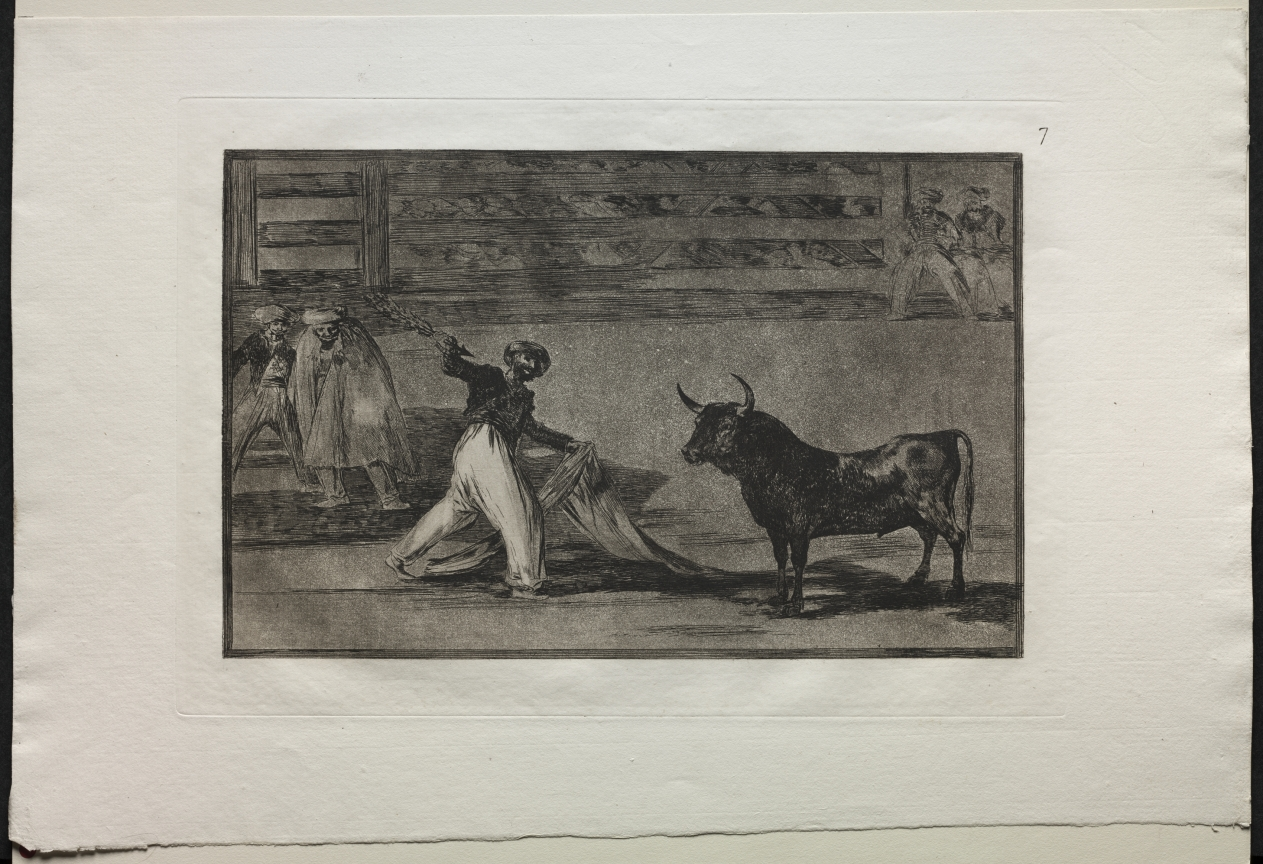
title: Bullfights: Origin of the Harpoons or Banderillas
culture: Spain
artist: Francisco de Goya (Spanish, 1746–1828)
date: 1816, printed 1876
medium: engraving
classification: Print